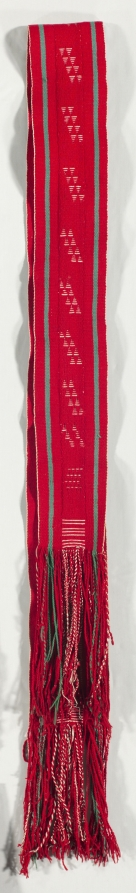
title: "Navajo Style" Belt/ Sash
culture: America, Native North American, Southwest, Navajo, Post-Contact, Early Period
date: c. 1900–1930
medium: warp face plain weave: cotton and wool (Germantown)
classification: Textile